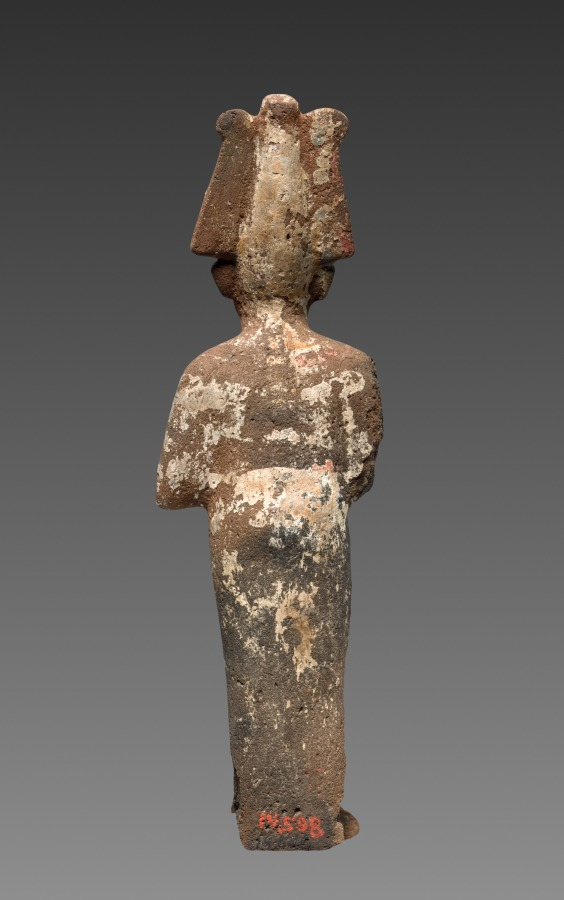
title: Statuette of Osiris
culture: Egypt, New Kingdom (1540–1069 BCE), Dynasties 19–20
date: 1295–1069 BCE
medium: painted terracotta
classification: Funerary Equipment